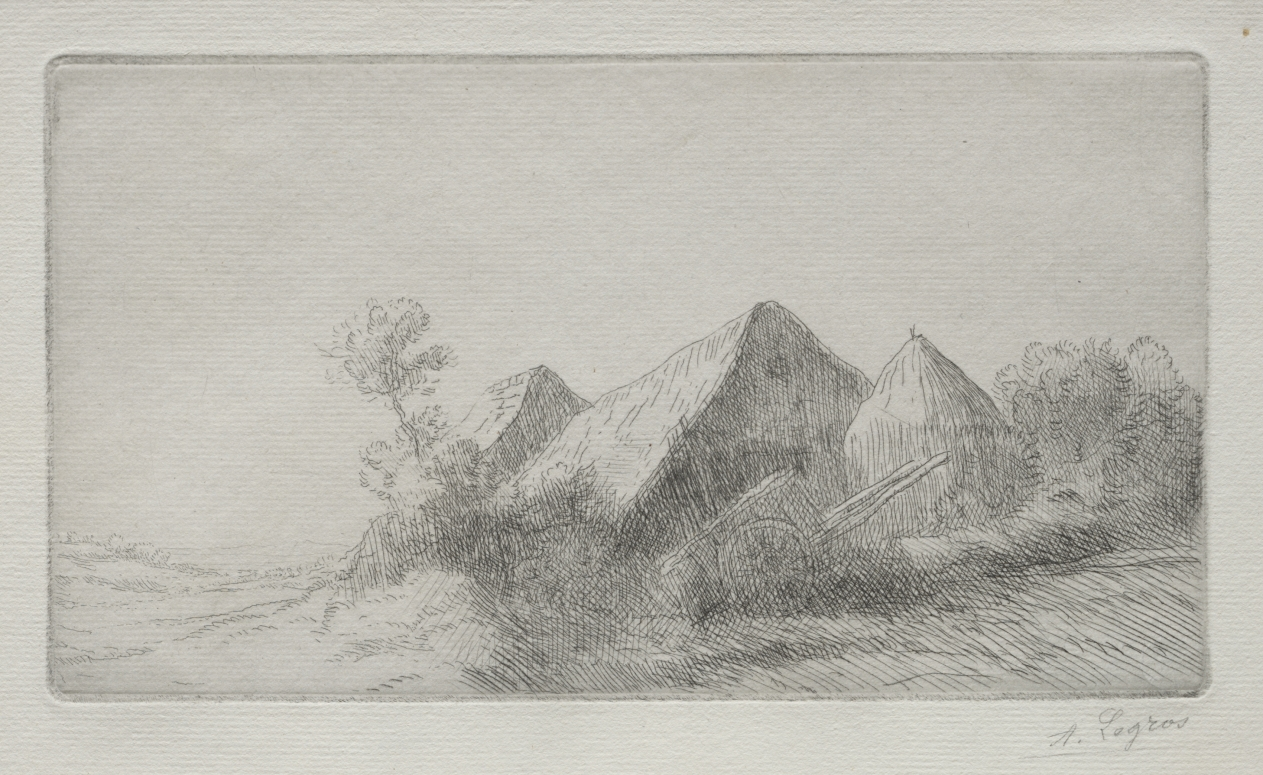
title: The Cart Shed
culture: France, 19th century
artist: Alphonse Legros (French, 1837–1911)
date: c. 1857–1911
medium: drypoint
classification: Print